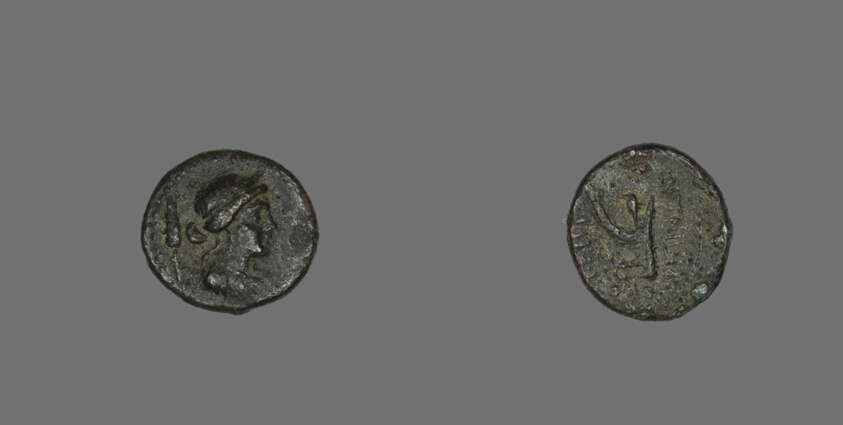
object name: Coin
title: Hexas (Coin) Depicting the Goddess Demeter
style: greek, ancient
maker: Greek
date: after 241 BCE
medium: Bronze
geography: Greece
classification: coin; ancient art; struck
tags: goddesses